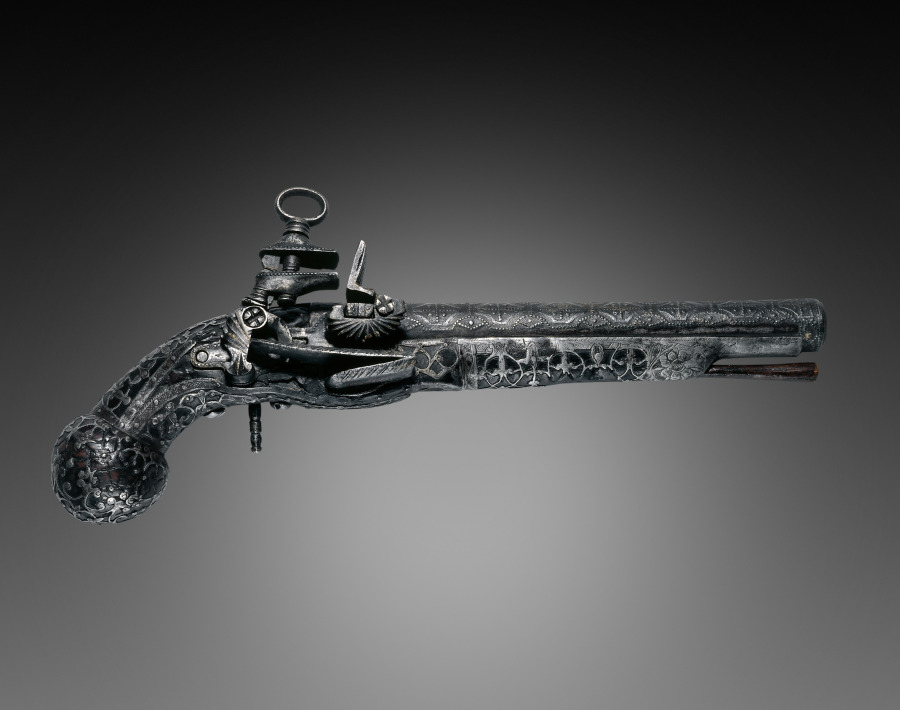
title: Snaphance Pistol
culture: Spain, Ripoll, 17th century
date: 1600s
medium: steel, ebony with silver inlay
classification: Arms and Armor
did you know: A snaphance pistol is a type of barrel-loading, flintlock gun. The snaphance is a spring-lock mechanism used for discharging a flint. This innovation greatly improved the efficiency of getting a shot off.